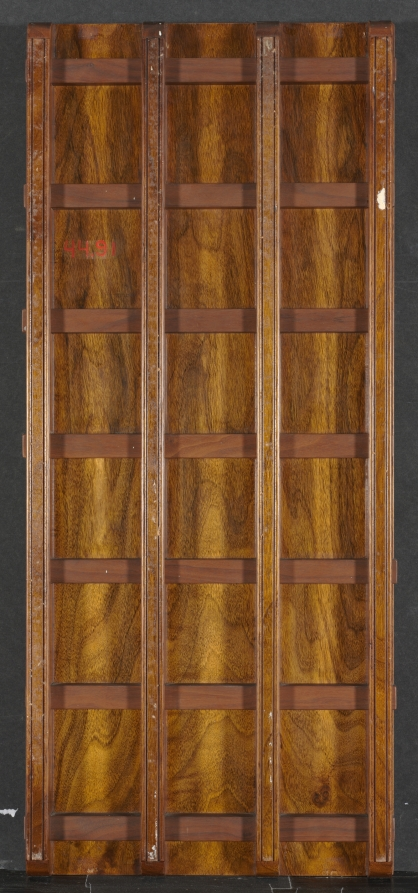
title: John the Baptist being carried to Zacharias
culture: Italy, 16th century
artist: attributed to Francesco Granacci (Italian, 1469–1543)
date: c. 1510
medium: tempera and oil with gold on wood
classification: Painting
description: Did Michelangelo paint some of this work? This panel formed part of a series depicting the life of John the Baptist, with other panels located in New York City and Liverpool, England. Scholars believe that as many as five artists may have participated in creating the artworks and disagree about who painted this panel. Michelangelo Buonarotti, a lifelong friend of Francesco Granacci’s, may have contributed, perhaps in the drapery of the figure in white.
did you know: The artist used gold to paint fine details of embroidery and individual strands of hair.